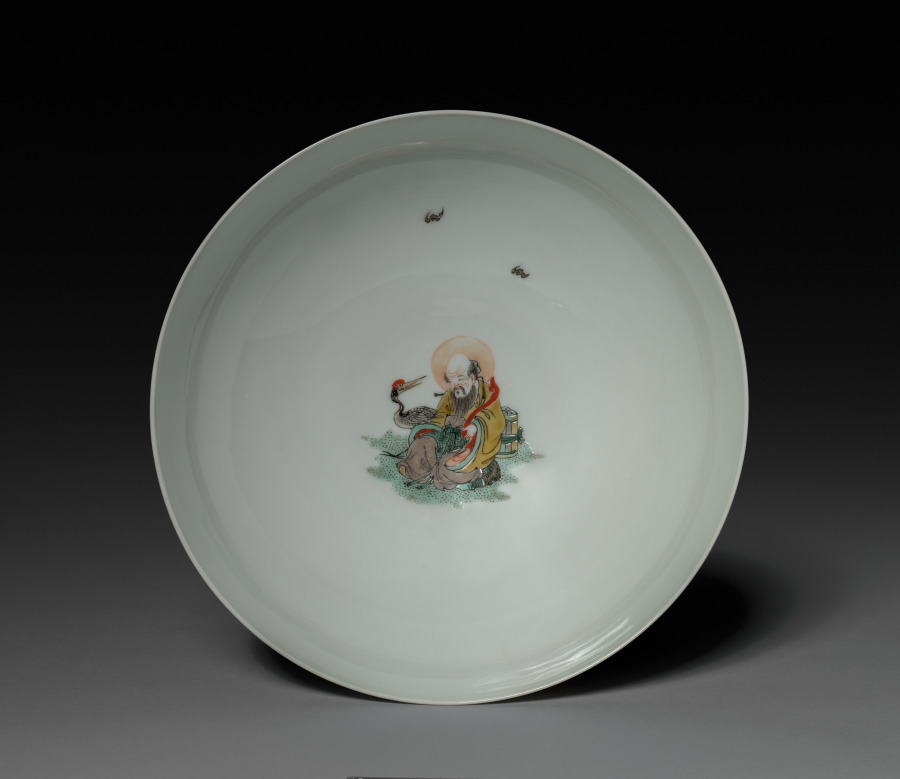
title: Bowl with Eight Immortals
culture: China, Jiangxi province, Jingdezhen kilns, Qing dynasty (1644-1911), Kangxi reign (1662-1722)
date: 1662–1722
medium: porcelain with famille verte overglaze enamel decoration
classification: Ceramic